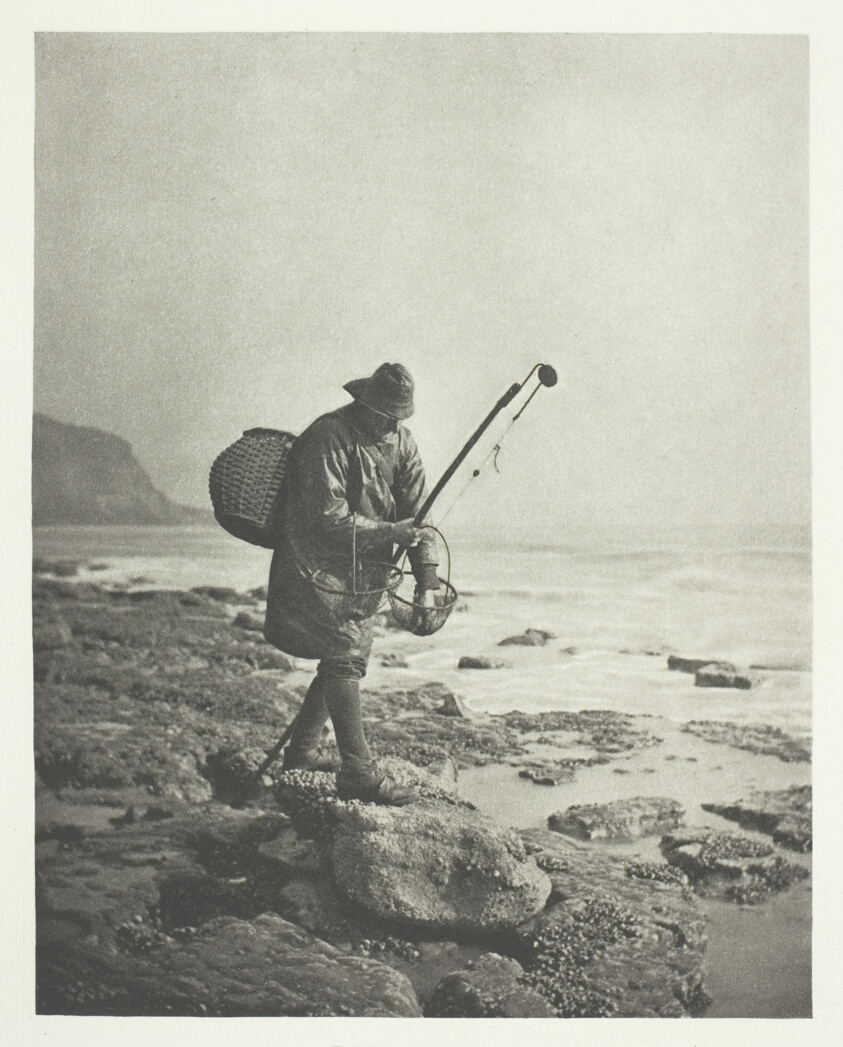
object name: Photograph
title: Prawning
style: 19th century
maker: B. Gay Wilkinson (English, 1857–1927)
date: 1888, printed January 1891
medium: Photogravure, from "Sun Artists, Number 6" (1891)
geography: England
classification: photogravure; photomechanical process; photography; photograph